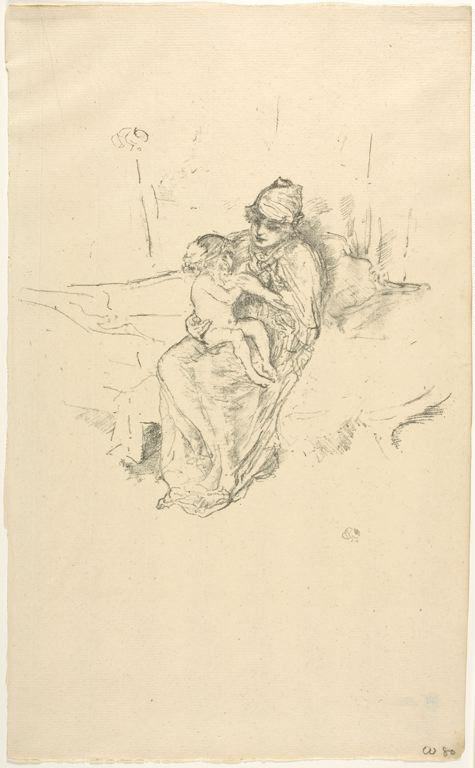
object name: Print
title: Mother and Child No. 1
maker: James McNeill Whistler (American, 1834-1903)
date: 1891, printed 1895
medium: Lithograph on cream laid paper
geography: United States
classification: prints and drawing; print; lithograph; paper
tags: mothers, children